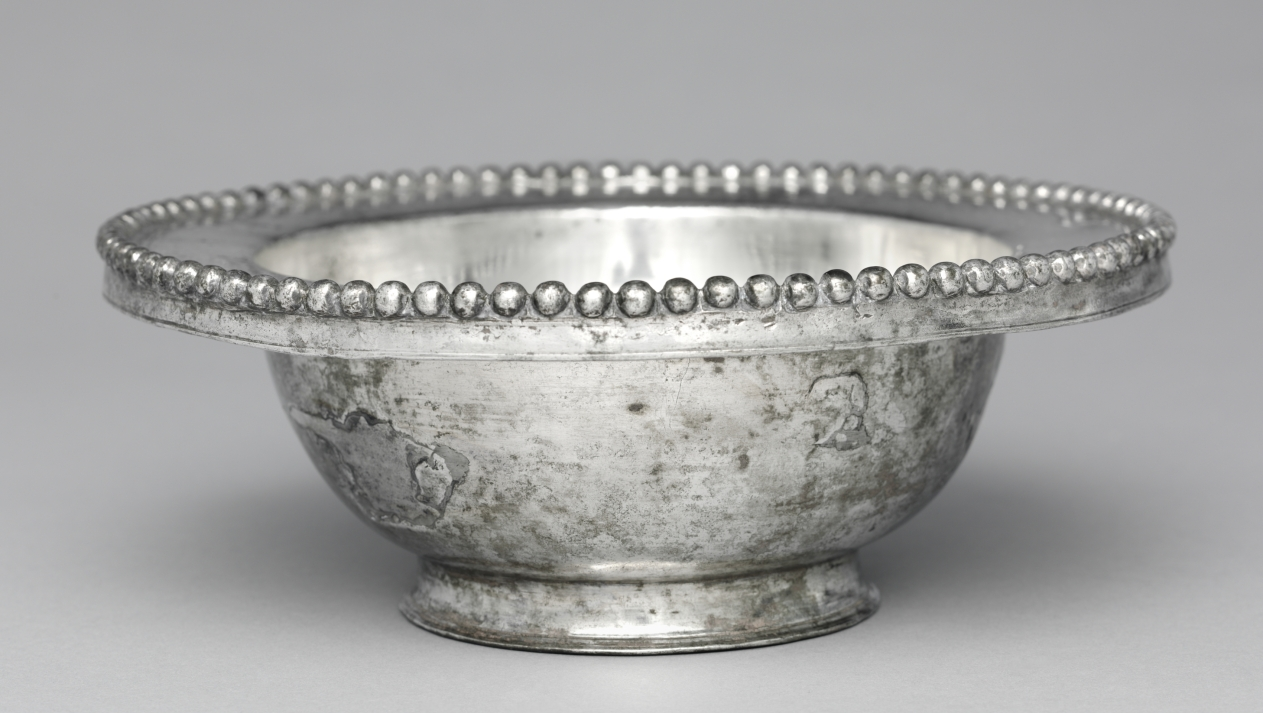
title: Bowl with Beaded Rim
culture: Byzantium, Syria(?), Byzantine period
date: 300–500 CE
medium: silver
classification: Metalwork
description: This bowl was probably intended for use in a private home, perhaps a fashionable villa on the Mediterranean coast. Wealthy Romans stored a variety of silver vessels and implements for entertaining and enjoyed using them while eating and drinking at social events. This bowl is decorated with a beaded rim, a feature often found on domestic silver bowls of this period. The basic shape was formed first by hammering. Then the bowl was polished and chased while it turned on a lathe. The beaded decoration was achieved by hammering the silver into a mold.